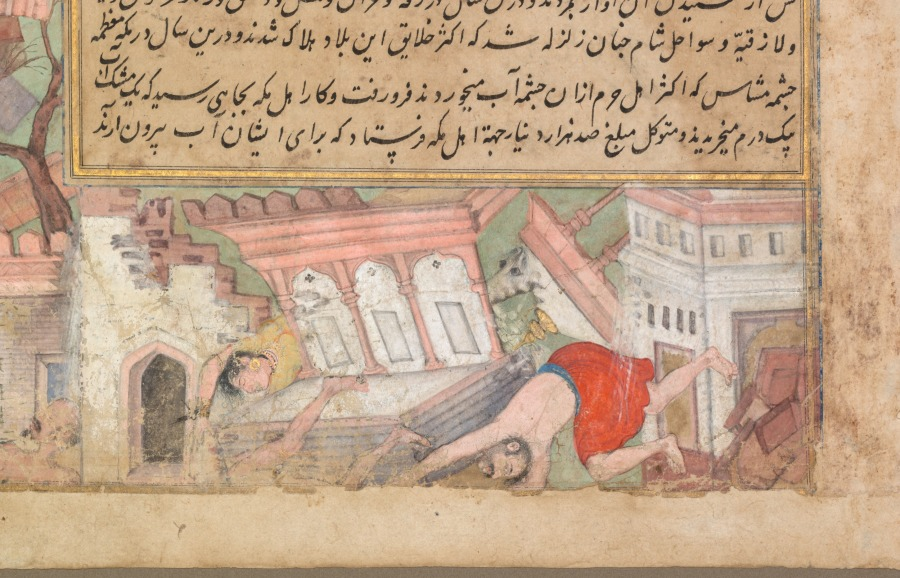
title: Page of disasters, from the Tarikh-i Alfi (History of the Thousand [Years])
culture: India, Mughal school, 16th century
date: c. 1595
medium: Gum tempera, ink, and gold on paper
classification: Painting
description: The 1,000th anniversary of Islam, according to the Hijri calendar followed by the Mughals and all Muslims, occurred during Akbar’s reign in 1592. He commemorated this milestone in many ways, including the commissioning of a new history of the Islamic world since the death of the Prophet Muhammad in 632. The episode discussed on this page took place during the 800s, when hailstorms beset Egypt and an earthquake hit Syria. The ruling caliph at the time was strongly prejudiced against Muslims who belonged to the Shi‘ite branch of Islam. Akbar seemed to be asking his artists to emphasize the natural disasters that took place, suggesting that they occurred as a result of the ruler’s intolerance.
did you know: Devastation after an earthquake includes a horse trapped under a fallen pavilion.